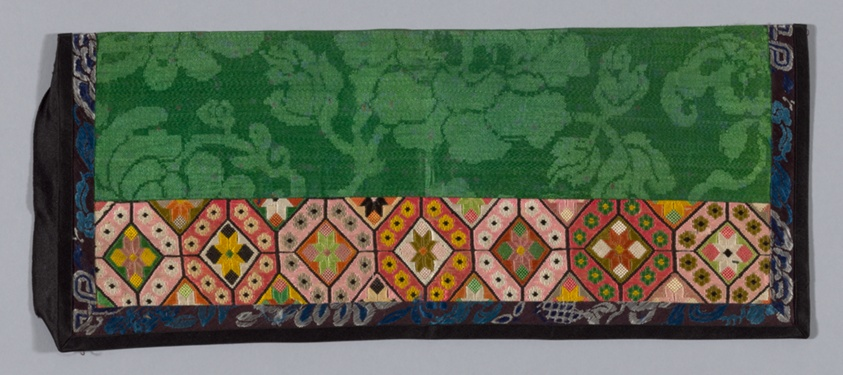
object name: Costume and Accessories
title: Trouser Band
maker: Han-Chinese (China)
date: Qing dynasty (1644–1911), 1875/1900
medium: Forty-four pairs and eight odd pieces of embroidered sleeve, ankle bands, etc. on gauze.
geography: China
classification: costume - embroidery; embroidery; costume